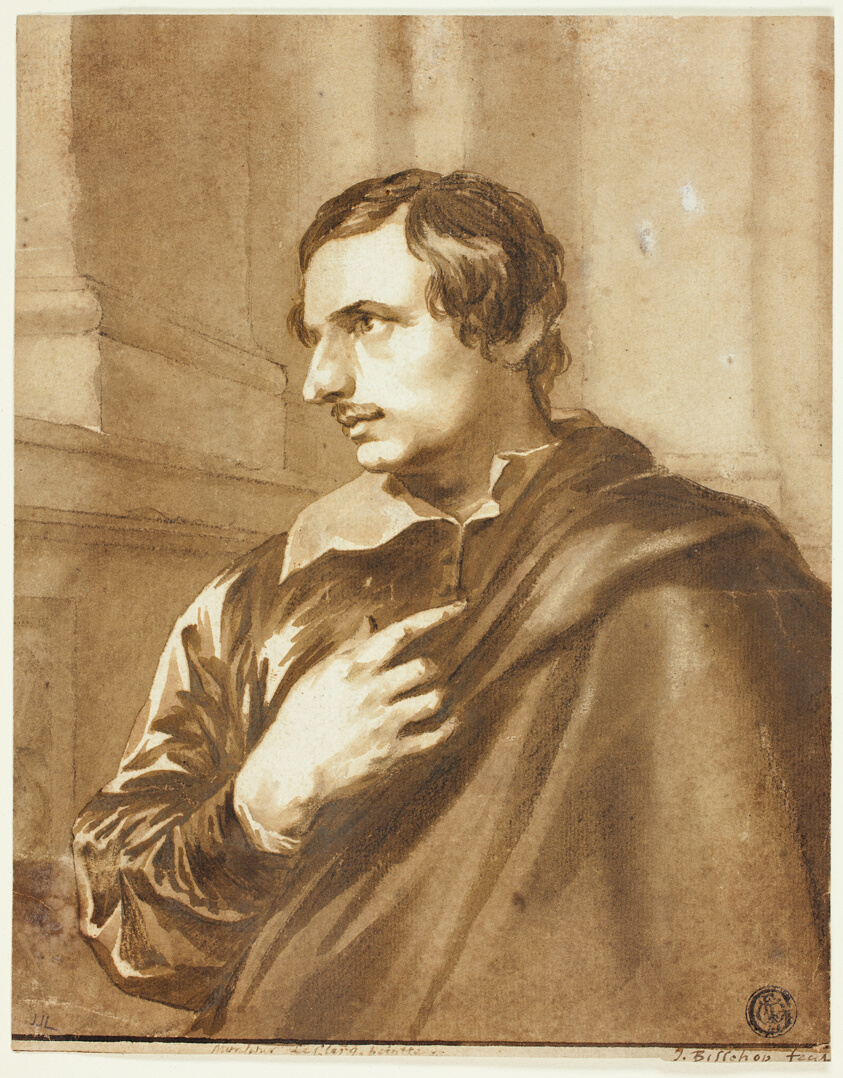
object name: Drawing and Watercolor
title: Jean Leclerc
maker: Jan de Bisschop (Dutch, c. 1628-1671); or after Anthony van Dyck (Flemish, 1599-1641)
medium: Pen and brown ink and brush and brown wash, with traces of black chalk, on ivory laid paper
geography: Holland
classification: ink or chalk wash; drawings (visual works); prints and drawing